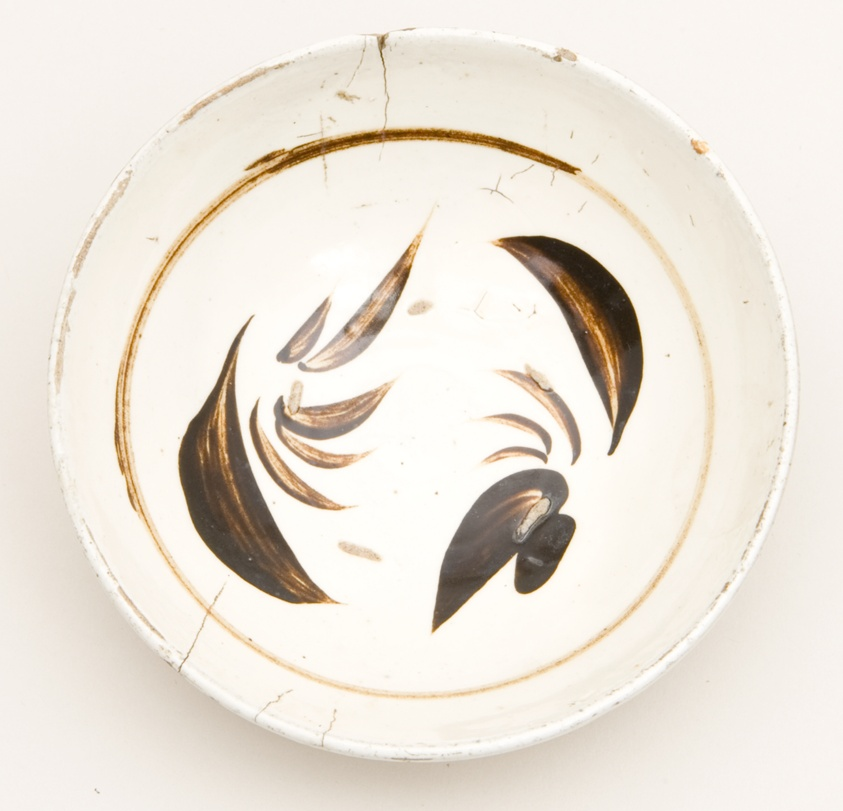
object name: Vessel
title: Bowl with Stylized Leaf-strokes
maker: China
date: Song/Jin dynasty, c. 12th/13th century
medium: Cizhou ware, glazed stoneware painted in iron-brown slip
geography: China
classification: vessel